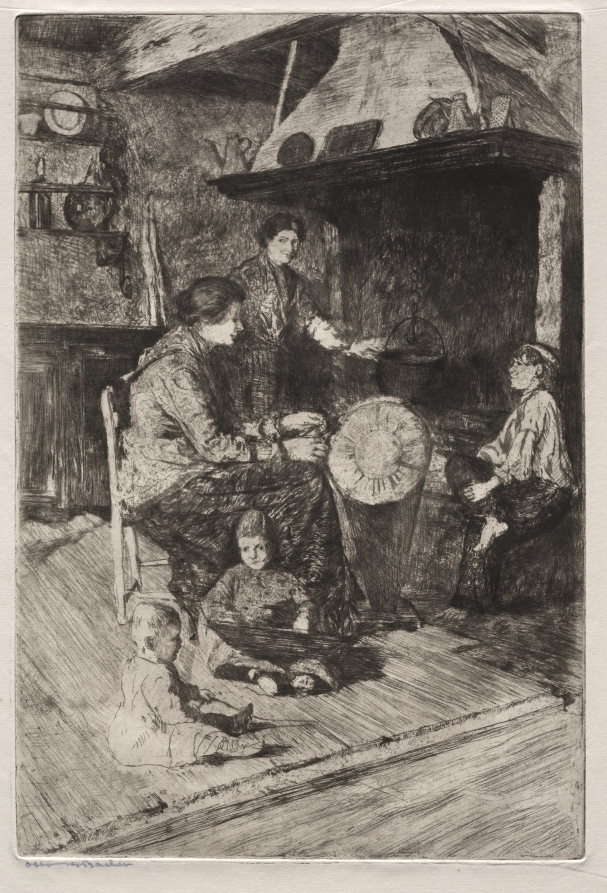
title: Etchings of Venice: The Lace Makers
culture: America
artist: Otto H. Bacher (American, 1856–1909)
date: 19th century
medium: etching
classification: Print